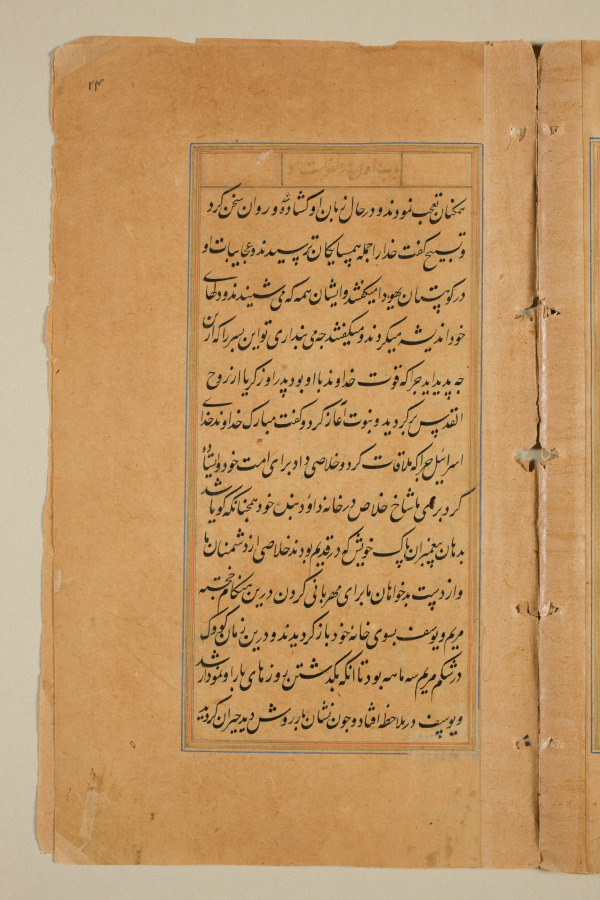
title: Text page from a Mirror of Holiness (Mir’at al-quds) of Father Jerome Xavier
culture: Mughal India, Allahabad, made for Prince Salim (1569–1627)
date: 1602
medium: Ink and gold on paper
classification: Manuscript